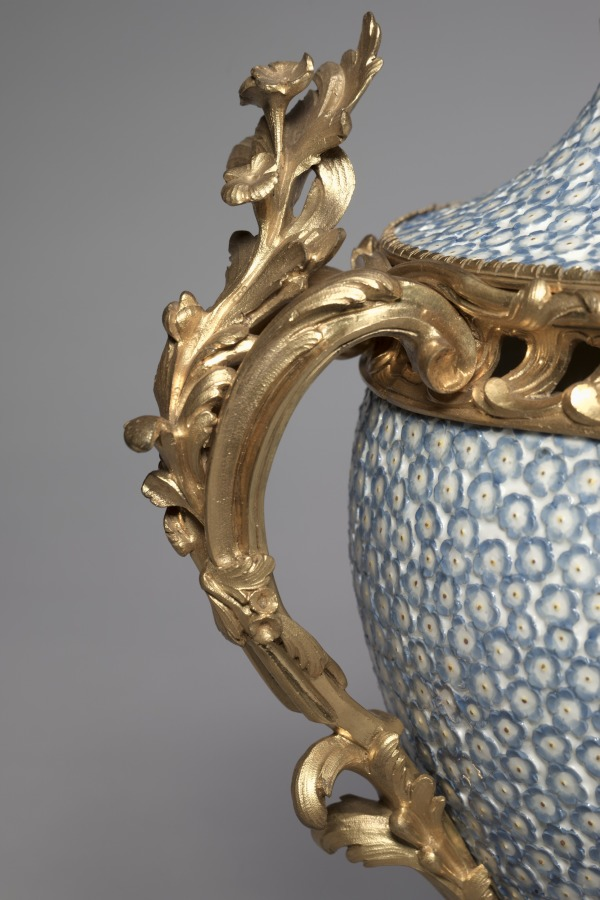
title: Vase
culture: Germany, 18th century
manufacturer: Meissen Porcelain Factory (German, est. c. 1710)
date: 1749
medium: porcelain mounted in gilt bronze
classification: Ceramic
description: One of these vases is dated 1749. They were perhaps part of a set of four covered vases that we know from documents were acquired by Mme. de Pompadour, mistress of Louis XV in 1752.